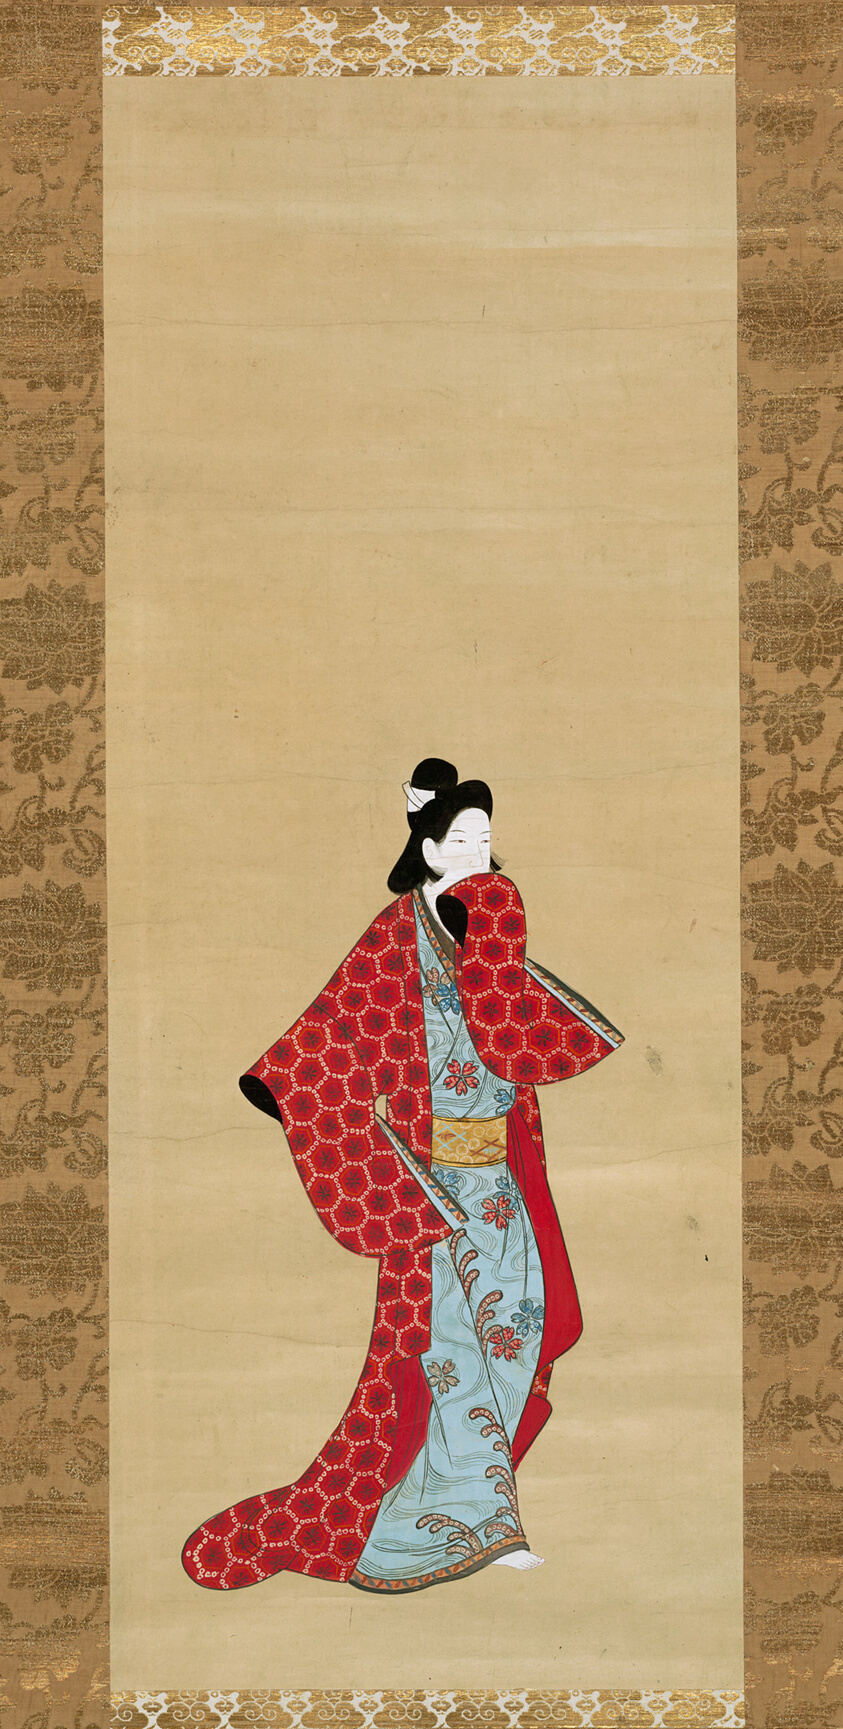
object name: Painting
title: Courtesan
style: Japanese (culture or style)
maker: Artist unknown; Japanese, 17th century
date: 1750/75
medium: Hanging scroll; ink and color on paper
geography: Japan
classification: hanging scroll; painting; asian art